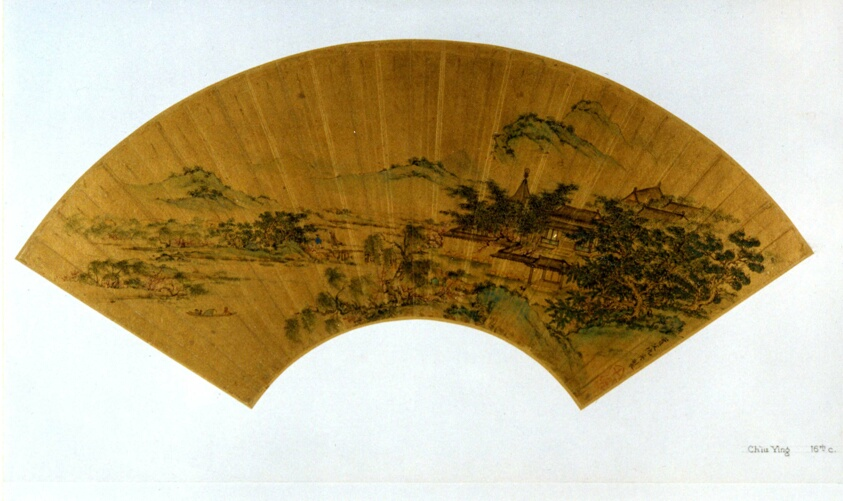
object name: Painting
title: Landscape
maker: Attributed to Qiu Ying 仇英 (Chinese, 1494-1552)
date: Ming dynasty (1369–1644) or Qing dynasty (1644-1911)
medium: Folding fan mounted as an album leaf; ink and color on gold paper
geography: China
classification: album leaf; painting; asian art